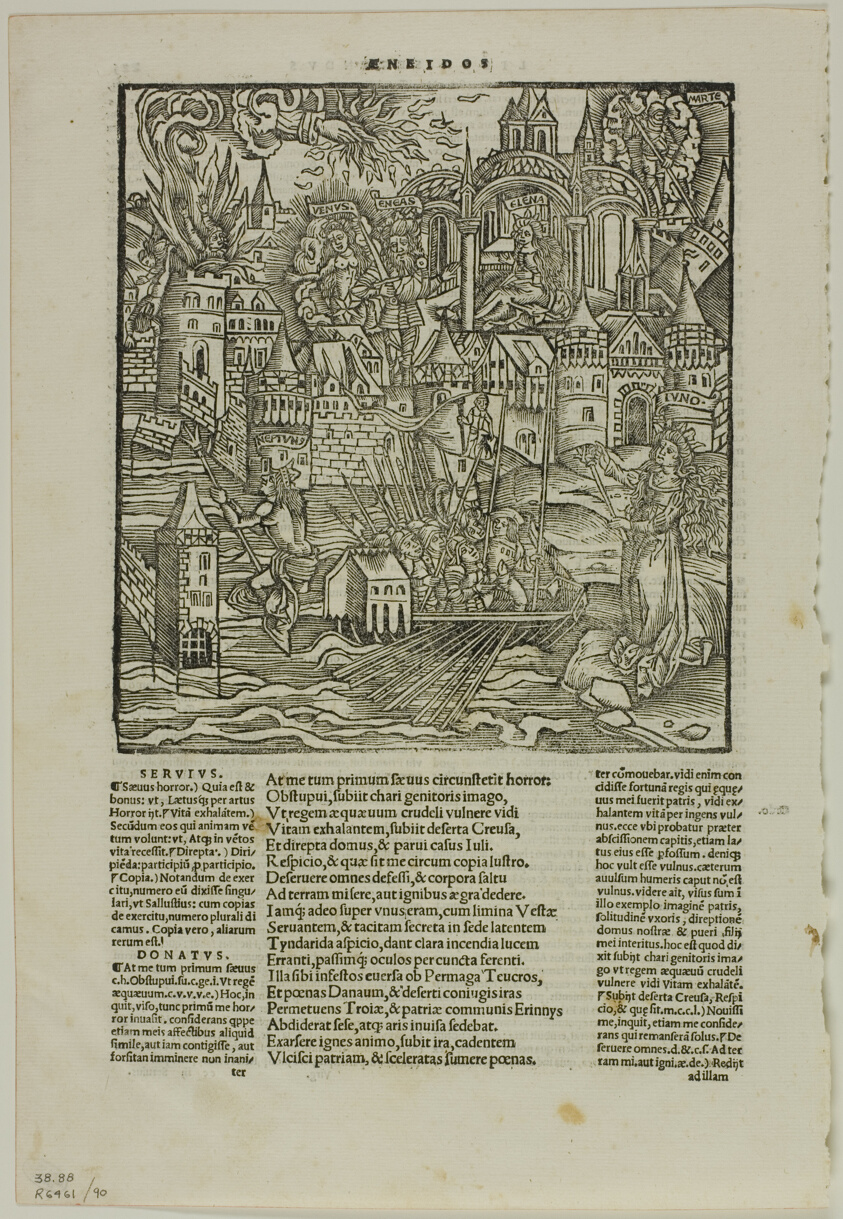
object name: Print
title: Leaf from Opera by Virgilius (after the Strasbourg Virgil, 1502), plate 90 from Woodcuts from Books of the XVI Century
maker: Unknown Artist (Italian, 16th century); assembled by Max Geisberg (Swiss, 1875-1943)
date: 1544, assembled into portfolio 1937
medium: Woodcut on paper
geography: Italy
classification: woodcut; print; prints and drawing